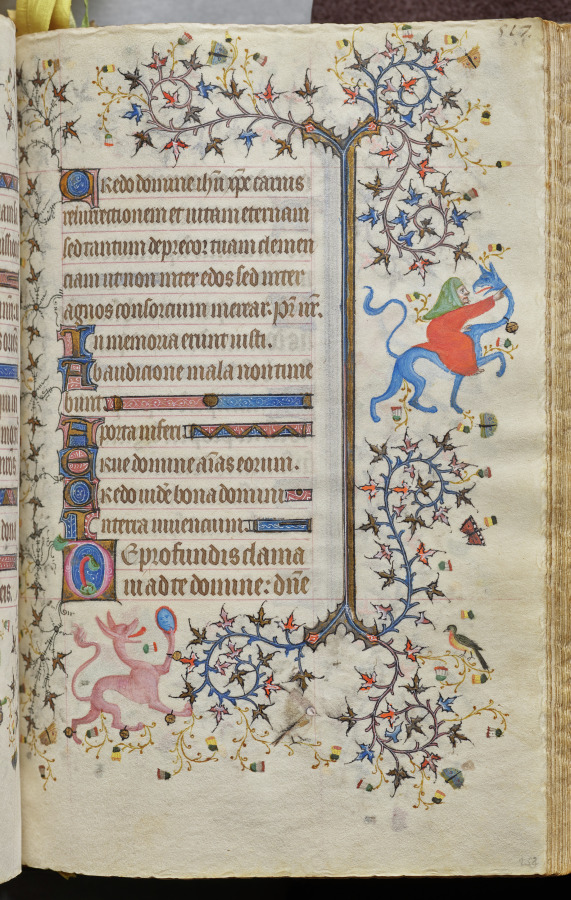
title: Hours of Charles the Noble, King of Navarre (1361-1425): fol. 253r, Text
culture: France, Paris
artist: Master of the Brussels Initials and Associates (French)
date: c. 1405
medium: ink, tempera, and gold on vellum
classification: Bound Volume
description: This precious volume was obviously highly prized by its owner, the French-born King of Navarre, who had his coat of arms painted on no less than twenty folios. Rather than directly commissioning this manuscript from a specific workshop, it seems that Charles the Noble acquired his book of hours -- perhaps ready-made for the luxury market -- while on a trip to Paris in 1404-05. A collaborative effort, six painting styles are evidenced within the pages of this codex, those of two Italians, two Frenchmen, and two Netherlanders. The painter who was responsible for the planning and decoration of the book, and who produced seventeen of the large miniatures, was a Bolognese artist known as the Master of the Brussels Initials. His principal assistant, responsible for most of the borders, was a Florentine who signed his name "Zecho" da Firenze on folio 208 verso.